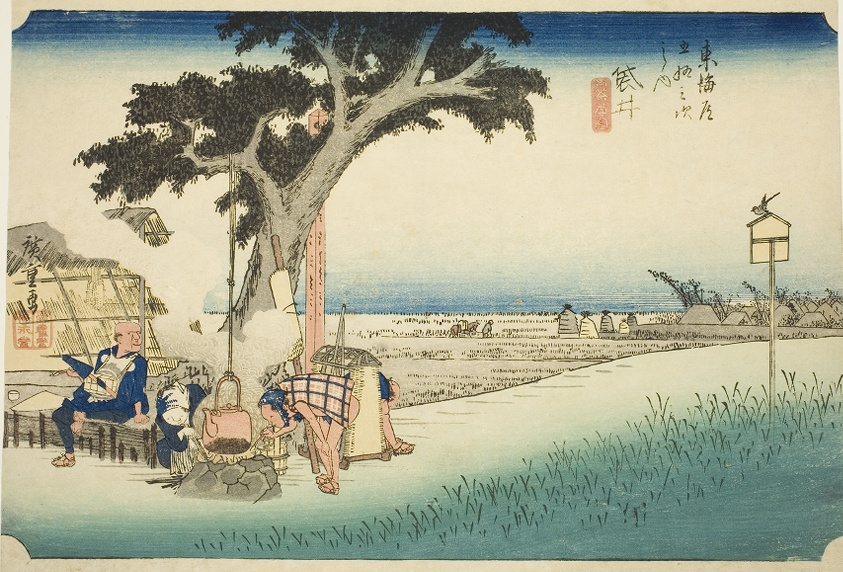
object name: Print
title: Fukuroi: Tea Stall (Fukuroi, dejaya no zu), from the series "Fifty-three Stations of the Tokaido (Tokaido gojusan tsugi no uchi)," also known as the Hoeido Tokaido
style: Japanese (culture or style)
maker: Utagawa Hiroshige 歌川 広重; Japanese, 1797-1858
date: c. 1833/34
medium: Color woodblock print; oban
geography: Japan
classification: woodblock print; print; asian art